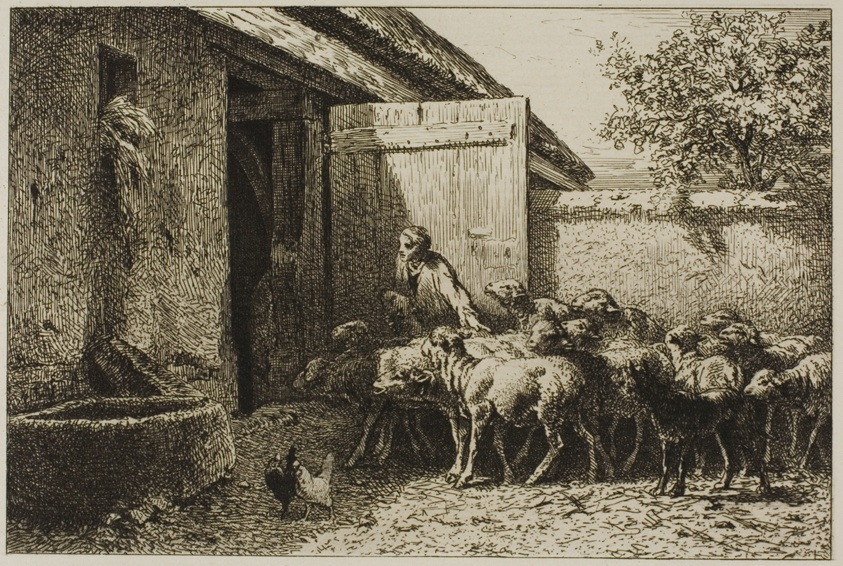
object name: Print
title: Shepherdess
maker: Charles Émile Jacque (French, 1813-1894)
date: 1864–66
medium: Etching and roulette on paper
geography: France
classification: etching; print; prints and drawing